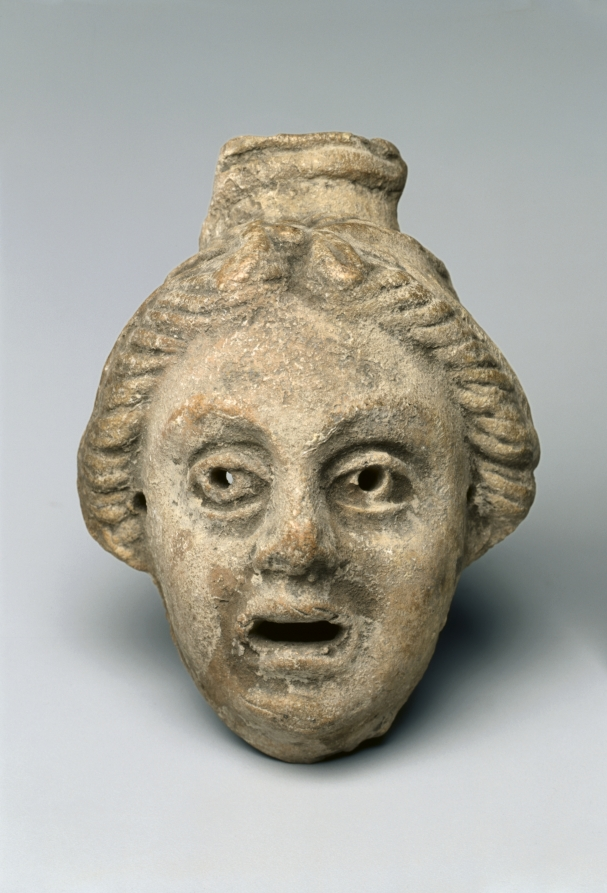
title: Mask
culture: Italy, Roman (?)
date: 1–100 CE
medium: terracotta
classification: Sculpture